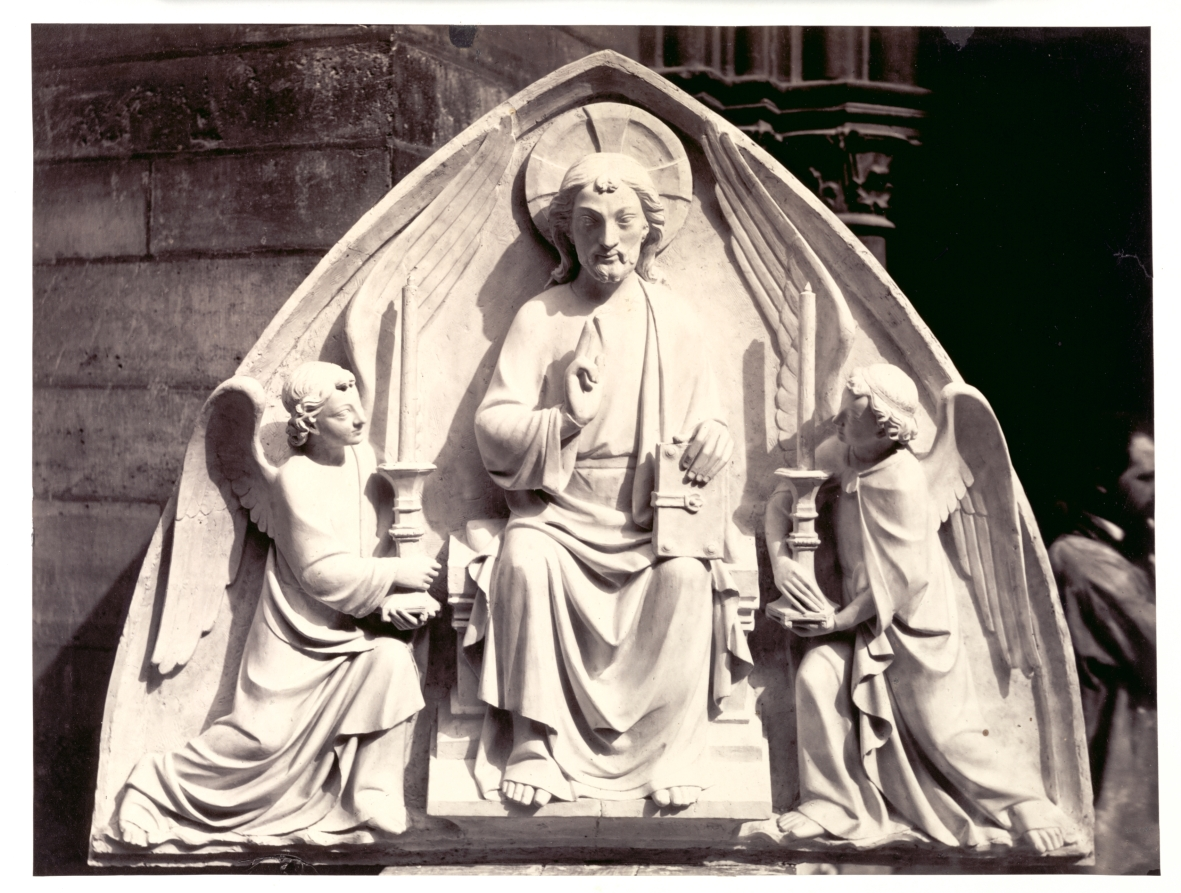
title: Tympanum, Strasbourg Cathedral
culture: France, 19th century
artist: Charles Marville (French, 1813–1879)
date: c. 1863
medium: albumen print from wet collodion negative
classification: Photograph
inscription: Written in pencil on recto: "Strasbourg/tympau(?) de la Chapelle St. Vincent de Paul." Embossed on mount: "CH MARVILLE/PHOTOGRAPHE/DU MUSEE IMPERIAL/DU LOUVRE"